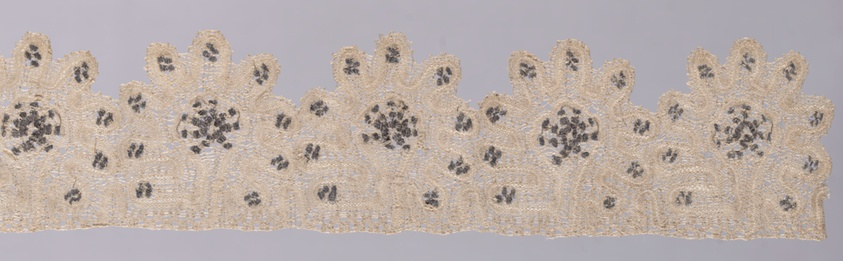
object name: Textile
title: Border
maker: Bohemia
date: 1750/1825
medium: Linen, silk, and gold-gilt-silver-strip-wrapped silk, bobbin part-lace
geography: Bohemia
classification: textile; lace - bobbin; lace